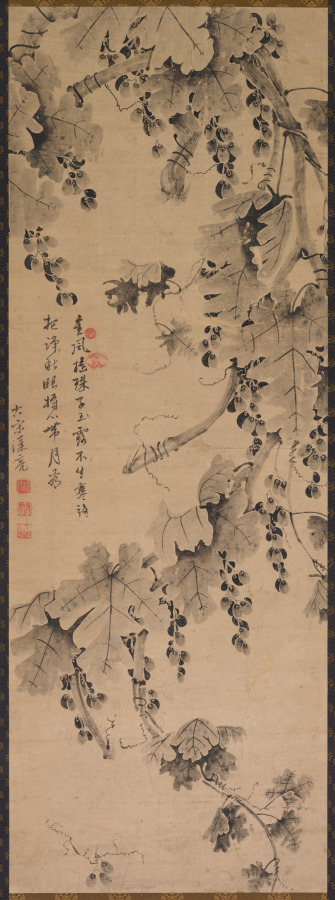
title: Grapevine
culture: China, Qing dynasty (1644–1911)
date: 1700s–1800s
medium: hanging scroll; ink on paper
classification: Painting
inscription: Two-line calligraphic inscription with signature. 5 unidentified seals.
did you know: Clusters of grapes can represent both abundant wealth and numerous offspring.